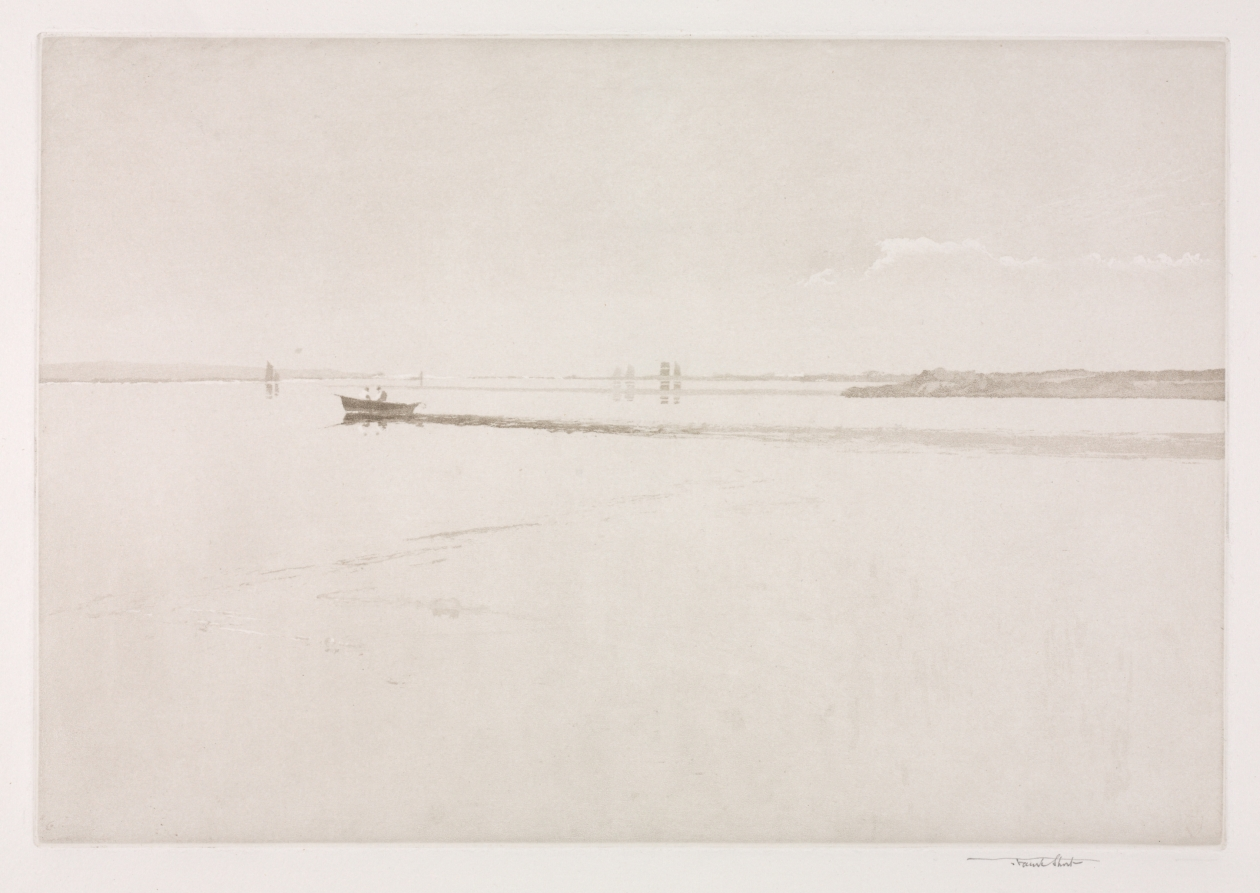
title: Morning Haze in Chichester Harbor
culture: England, 20th century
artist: Frank Short (British, 1857–1945)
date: 1922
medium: aquatint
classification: Print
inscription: Lower right, in pencil: "Frank Short"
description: Short is recognized as an influential teacher and master of intaglio processes who revived the use of mezzotint and aquatint, both tonal techniques. The discipline he required of his students as head of engraving at the Royal College of Art was largely responsible for the technical excellence of British etching during the 1910s through the 1940s. Short frequently depicted peaceful, far-reaching, level landscapes, or seascapes with few humans. With an economy of means, he achieved beautiful, atmospheric results.